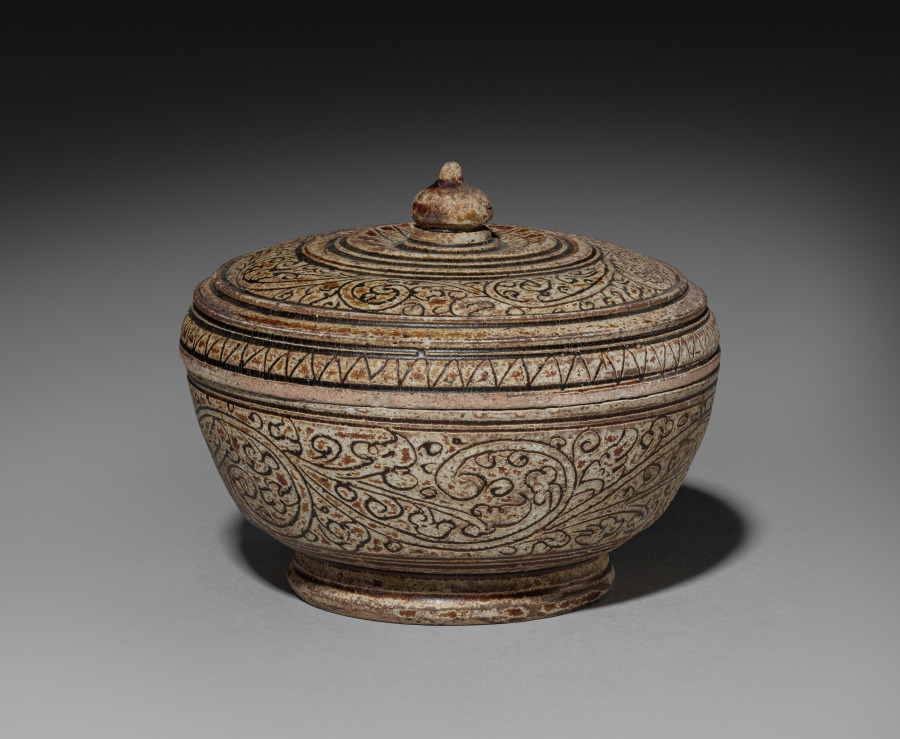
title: Covered Jar, Sawankhalok ware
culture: Thailand, Sukhothai Period, 14th century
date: 1300s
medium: pottery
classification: Ceramic